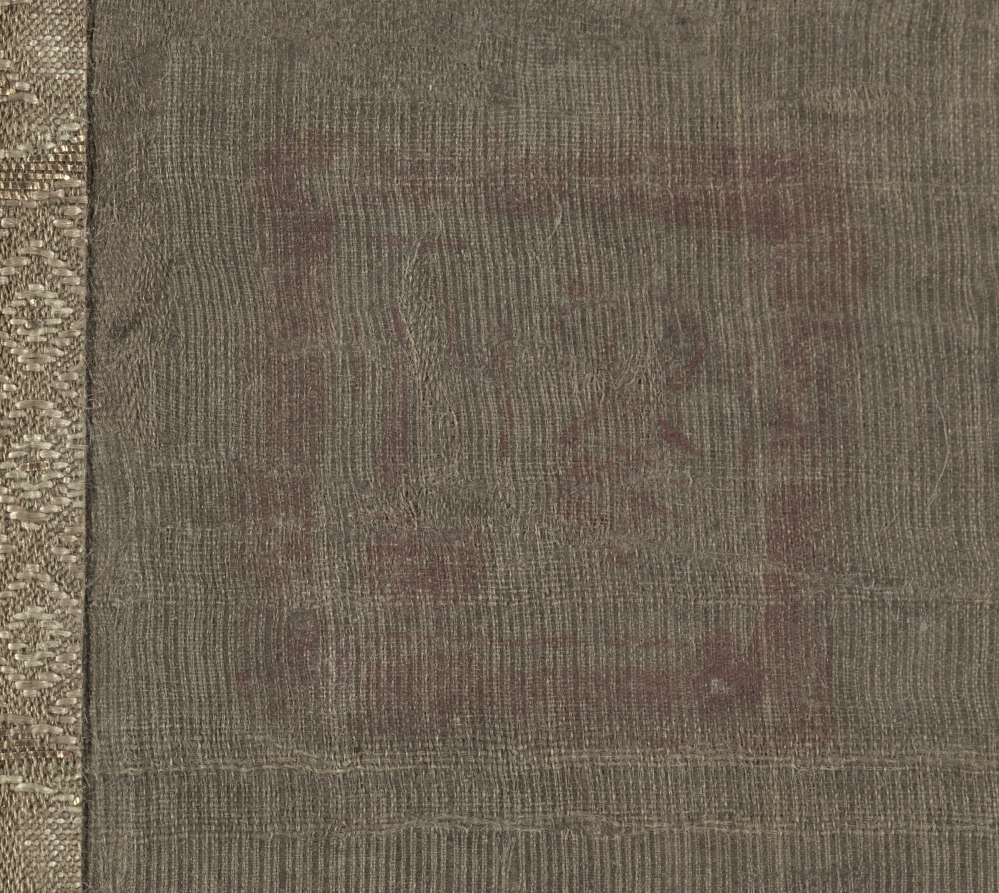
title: Bamboo in Four Seasons: Winter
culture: China, Yuan dynasty (1271-1368)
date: 1279–1368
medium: hanging scroll; ink on silk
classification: Painting